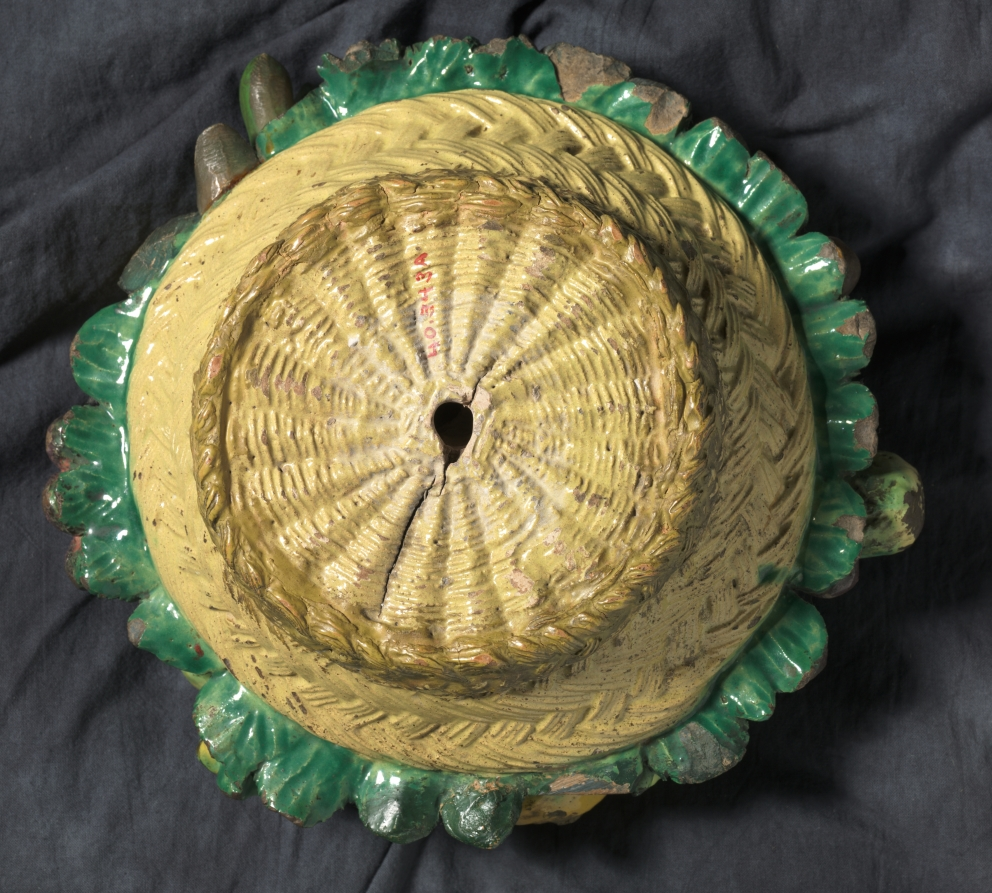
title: Dovizia (Plenty)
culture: Italy, Florence, 16th century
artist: Giovanni della Robbia (Italian, 1469–1529/30)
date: c. 1520–29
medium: glazed terracotta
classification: Sculpture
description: Many elite Florentine Renaissance homes had sculptures of idealized young women carrying nature’s bounty, such as this work. The motif stems from a statue by Donatello (about 1386–1466) that towered over Florence’s main public market. At home, however, the sculpture became a talisman for the family’s well-being. The city-state’s low birth rate was a serious political matter, and such a sculpture was believed to stimulate fertility while also promoting motherhood and bolstering financial success.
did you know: Inspired by an over life-sized, public sculpture by Donatello, Giovanni della Robbia reduced the figure for a domestic setting.